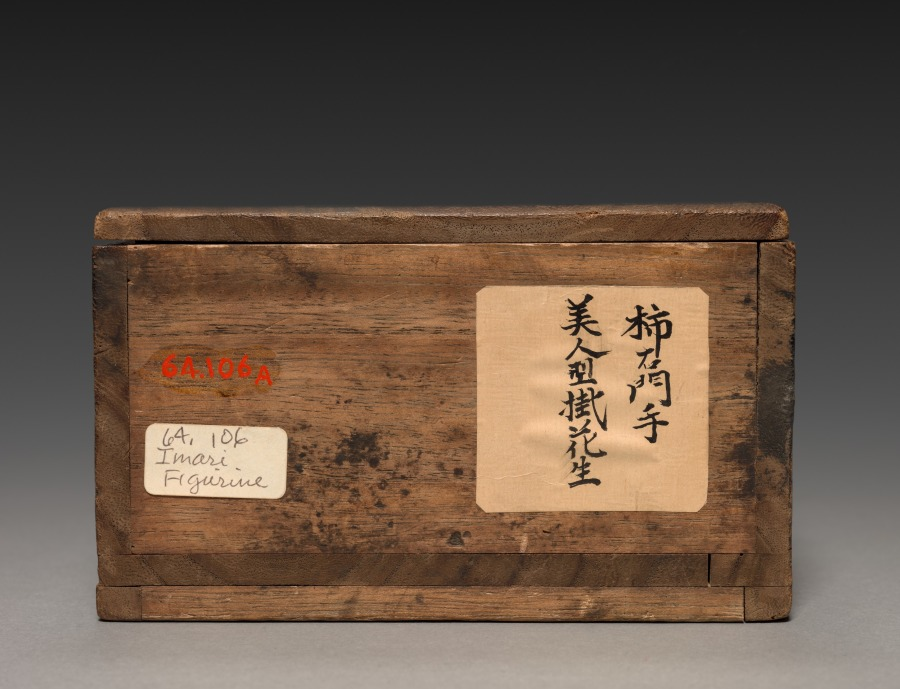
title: Standing Figure of a Beauty: Arita Ware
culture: Japan, Edo period (1615–1868)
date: 1600s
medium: porcelain with overglaze enamel decoration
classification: Ceramic